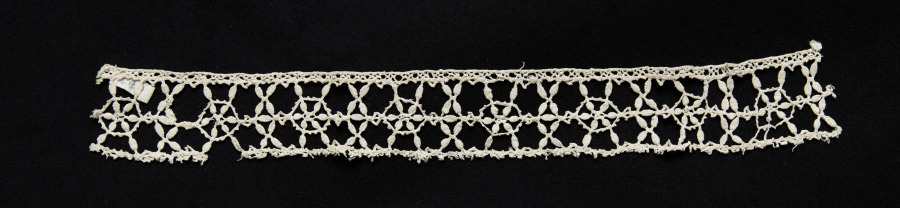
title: Lace Insertion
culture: Italy, Genoa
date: 1550–99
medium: Bobbin lace (needle lace, reticella design)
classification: Lace